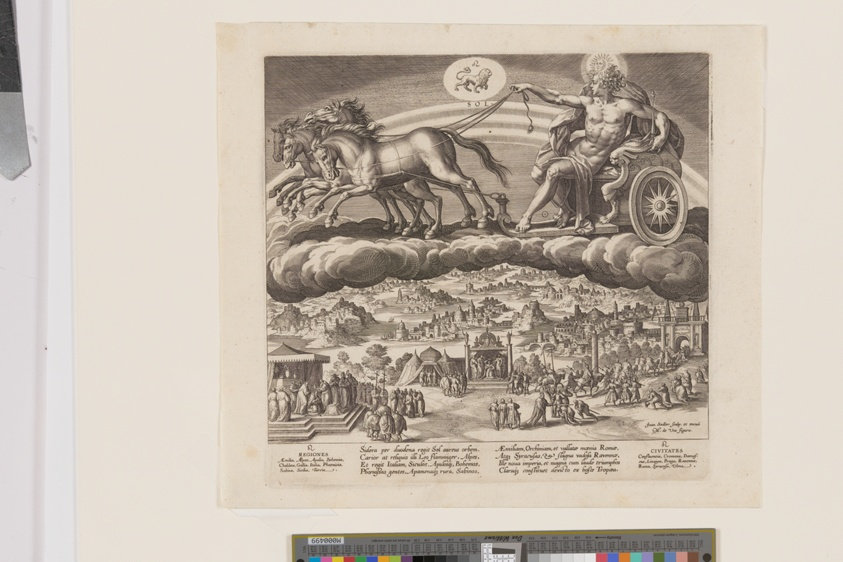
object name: Print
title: The Sun, from The Seven Planets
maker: Jan Sadeler I (Flemish, 1550–1600); after Maarten de Vos (Flemish, 1532–1603)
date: 1585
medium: Engraving on ivory laid paper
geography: Flanders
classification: engraving; paper; print; prints and drawing